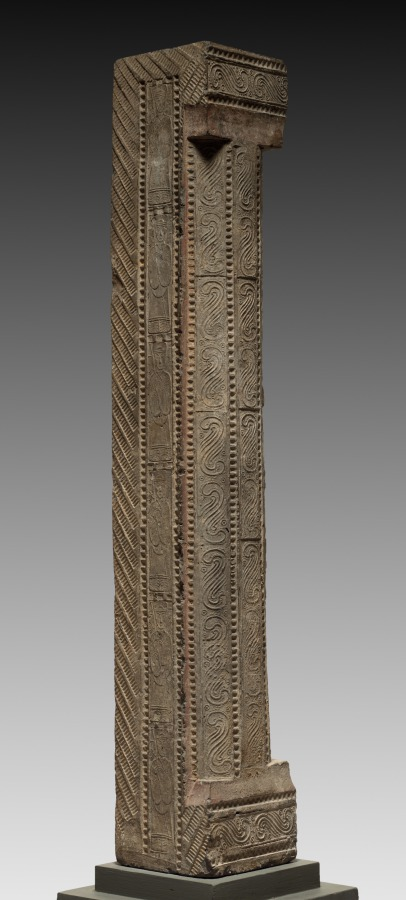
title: Hollow Tile: Column from Tomb-Chamber Doorway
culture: China, Han dynasty (202 BCE–220 CE)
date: 100–200 CE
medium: earthenware, die-stamped relief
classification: Ceramic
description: Striding tigers (top), racing horsemen (right column), and reverent officials (left column) are stamped into the surface of this underground portal to a tomb. The doorway preserves in stone the post-and-lintel structure, a basic element of Chinese wooden architecture. By the first century AD, a revolution in Chinese tomb construction and furnishing had taken place. Tombs lined with decorated bricks and tiles replace the earlier tombs constructed with only rammed earth-walls. Ceramic surrogates or models of stoves, houses, servants, and pets filled these more durable chambers, symbolically extending the creature comforts of this world into the world after death.